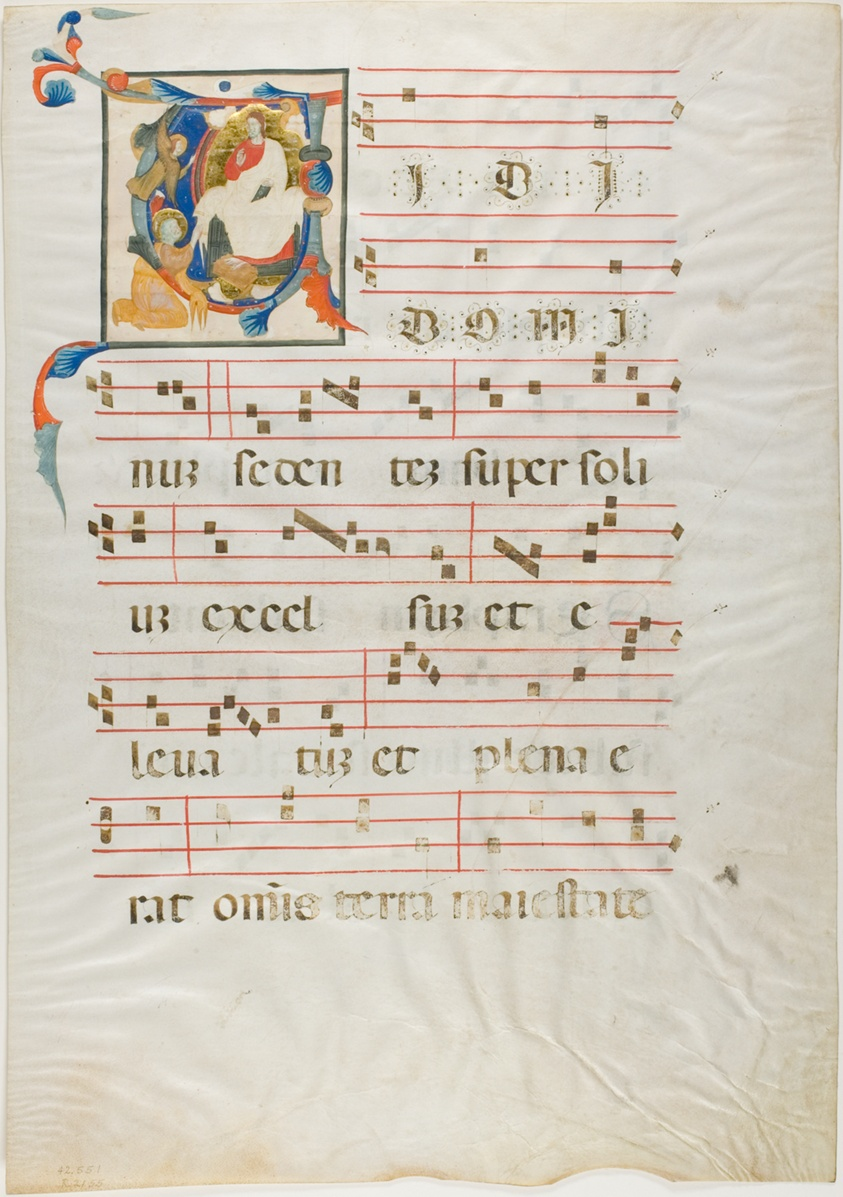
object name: Drawing and Watercolor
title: Saint Kneeling Before God Enthroned in a Historiated Initial "V" from an Antiphonary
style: medieval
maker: Italian (Rimini); follower of Neri da Rimini (Italian, active 1300-1338)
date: 1310/15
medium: Manuscript cutting in tempera and gold leaf, with gothica textualis inscriptions in Latin in black ink, ruled in red ink, and with other decorations, on parchment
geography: Italy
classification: tempera; manuscript; drawings (visual works); prints and drawing